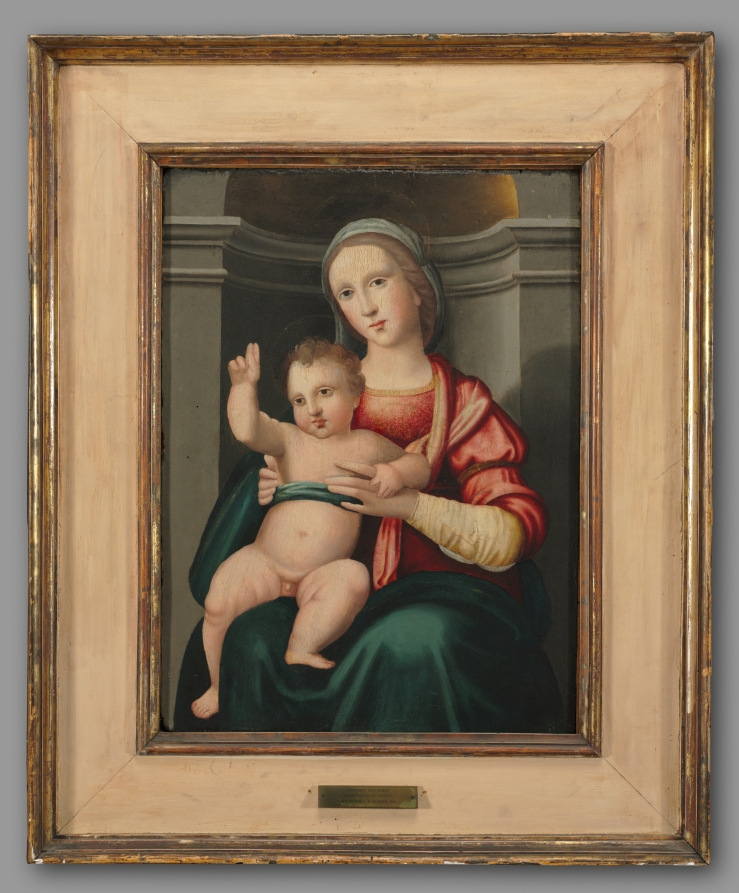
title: Madonna and Child in a Niche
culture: Italy, 16th century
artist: attributed to Antonio del Ceraiolo (Italian)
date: c. 1520s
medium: oil on wood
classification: Painting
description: This image of Madonna with the Christ Child on her lap has been extensively altered by restoration. During the Renaissance, it was important that the Christ Child's genitalia be exposed, for it declared that Christ is the humanization of God, that he experienced temptation, and that in his exposure, he was without shame. When it was repainted, a cloth was added to the image to cover the Christ Child's genitalia. In 1941 the removal of old overpaint returned the painting more closely to its original state.